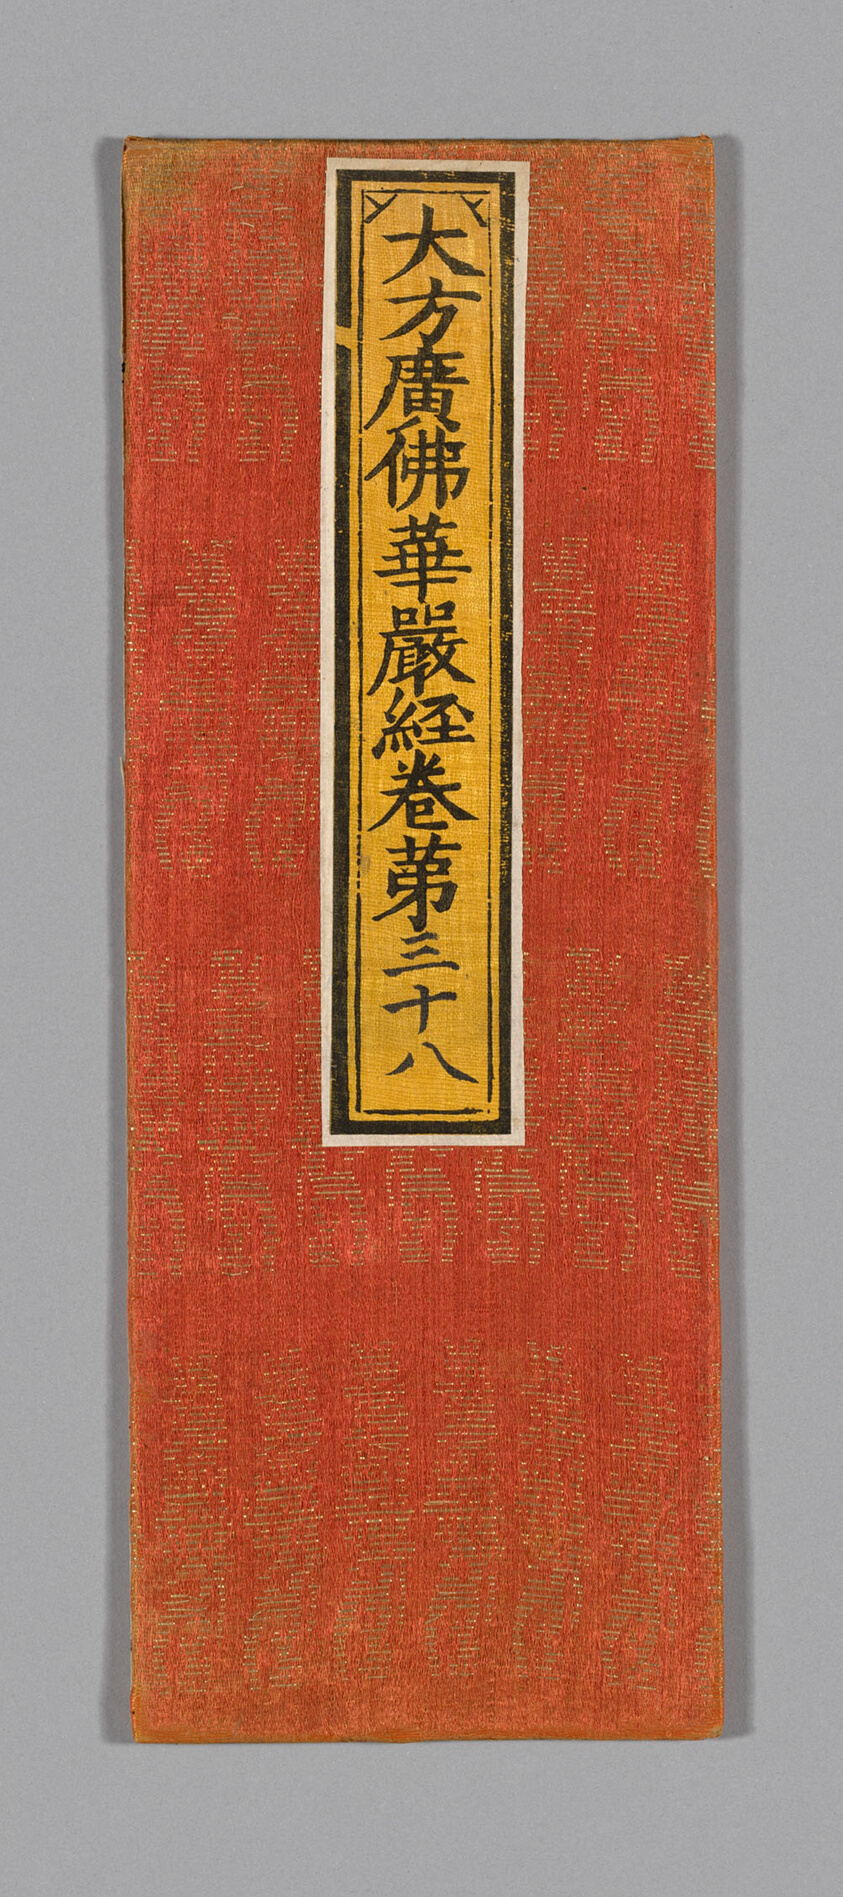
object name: Textile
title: Sutra Cover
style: ming, Chinese (culture or style), East Asian, asian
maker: China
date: Ming dynasty (1368–1644), c. 1590's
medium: Silk and gold-leaf-over-lacquered-paper strips, warp-float faced 4:1 satin weave with supplementary patterning wefts bound in weft-float faced 1:4 satin interlacings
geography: China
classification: textile; weaving